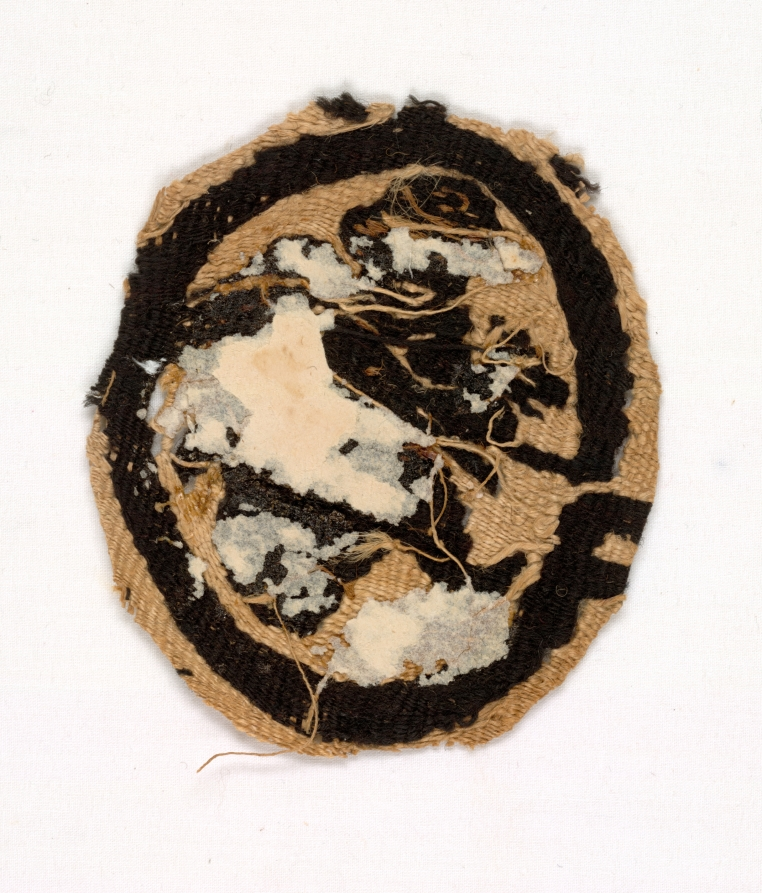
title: Fragment with Running Figure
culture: Egypt, Byzantine period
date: 500s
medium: tapestry; linen and wool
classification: Textile